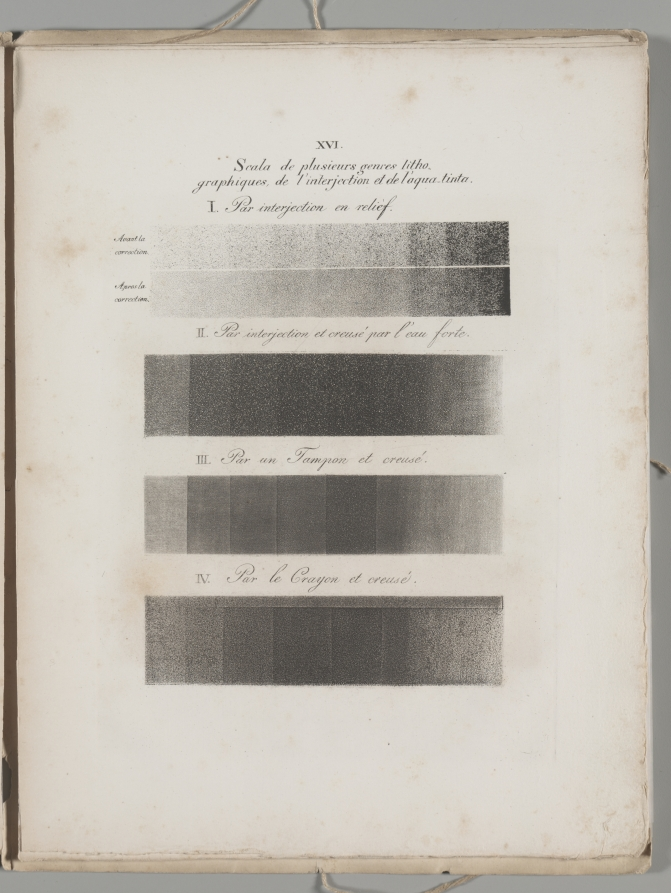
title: Art of the Lithograph: Toning Samples, Plate XVI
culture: Germany, 19th century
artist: Alois Senefelder (German, 1771–1834)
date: 1819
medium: lithograph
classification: Portfolio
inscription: On plate: XVI Scala de plusieurs genres lithographiques